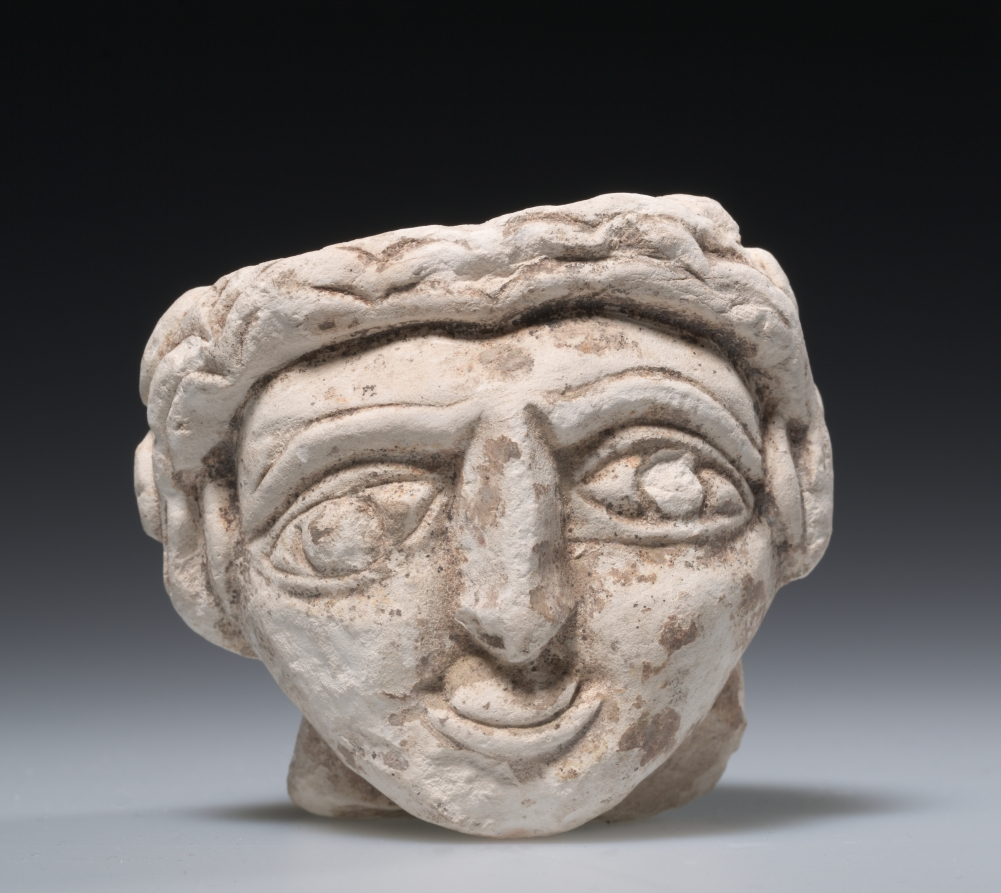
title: Female Head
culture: Egypt, Coptic period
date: 400s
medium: limestone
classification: Sculpture